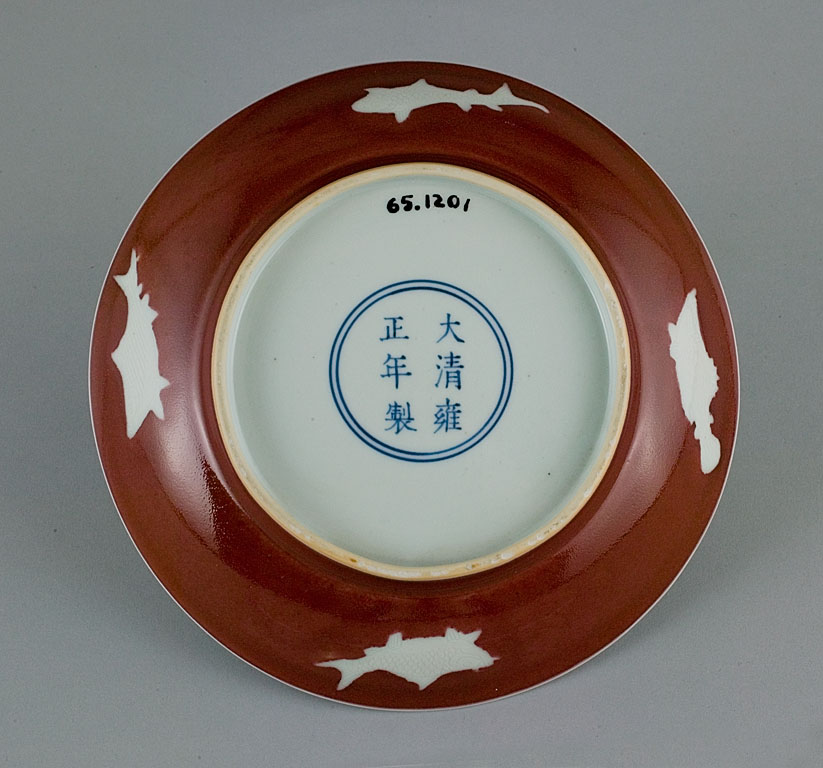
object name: Vessel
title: Dish with Flared Rim and Fish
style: Chinese (culture or style)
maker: China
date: Qing dynasty (1644–1911), Yongzheng reign mark and period (1723–1735)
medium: Porcelain with copper-red glaze and underglaze incised decoration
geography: China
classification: dish (vessel); asian art; ceramics; vessel